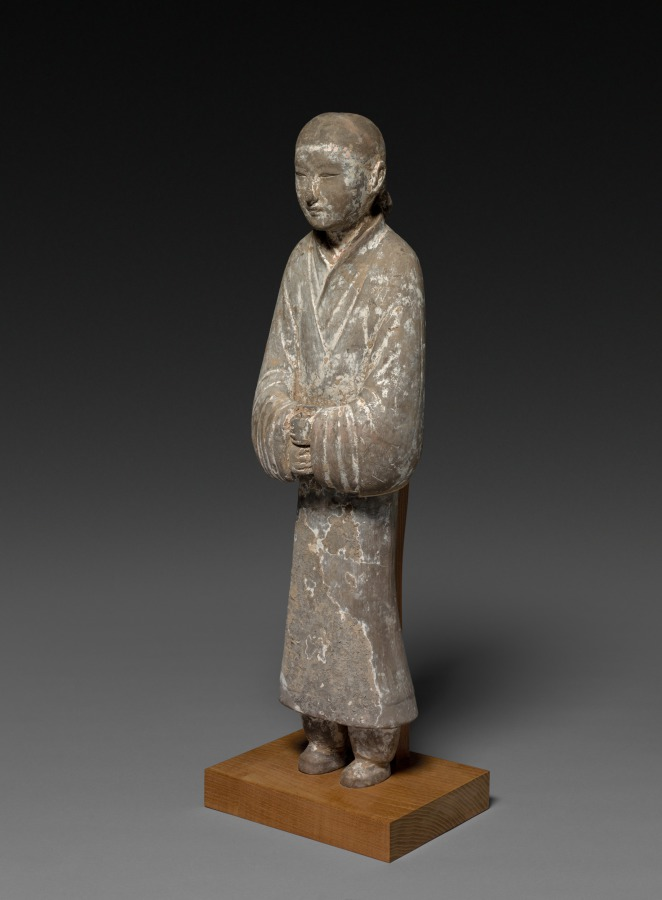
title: Female Attendant (Tomb Figurine)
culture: China, probably Shaanxi province, Western Han dynasty (206 BCE–8 CE)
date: 200s BCE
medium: gray earthenware with slip coating and traces of polychromy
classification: Sculpture